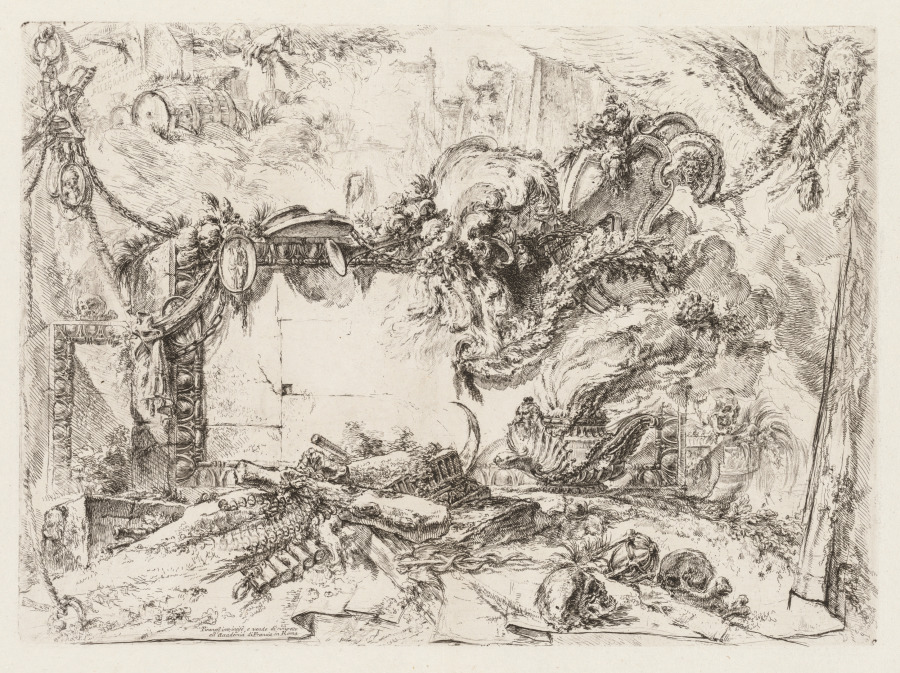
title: The Monumental Tablet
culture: Italy, 18th century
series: Grotteschi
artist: Giovanni Battista Piranesi (Italian, 1720–1778)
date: 1745–50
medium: etching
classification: Print